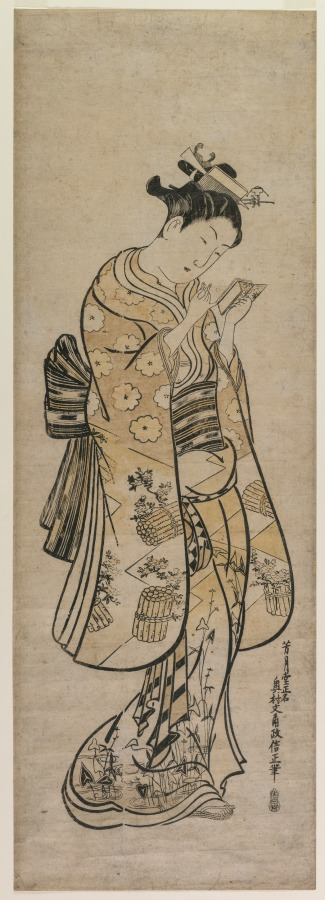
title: A Beauty with a Mirror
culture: Japan, Edo period (1615–1868)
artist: Okumura Masanobu (Japanese, 1686–1764)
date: c. 1743–46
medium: woodblock print with hand-coloring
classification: Print